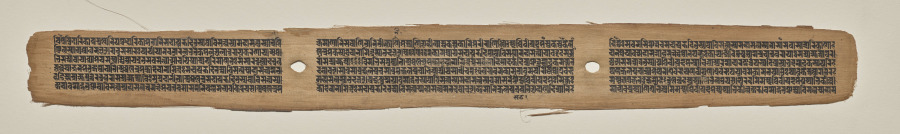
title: Text, folio 185 (recto), from a Manuscript of the Perfection of Wisdom in Eight Thousand Lines (Ashtasahasrika Prajnaparamita-sutra)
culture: Eastern India, Bihar, Vikramashila Monastery. Painting: Nepal, Kathmandu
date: Sunday, September 14, 1119 (year 239 of the Newar Samvat in the month of Ashvina)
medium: gum tempera and ink on palm leaves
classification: Painting